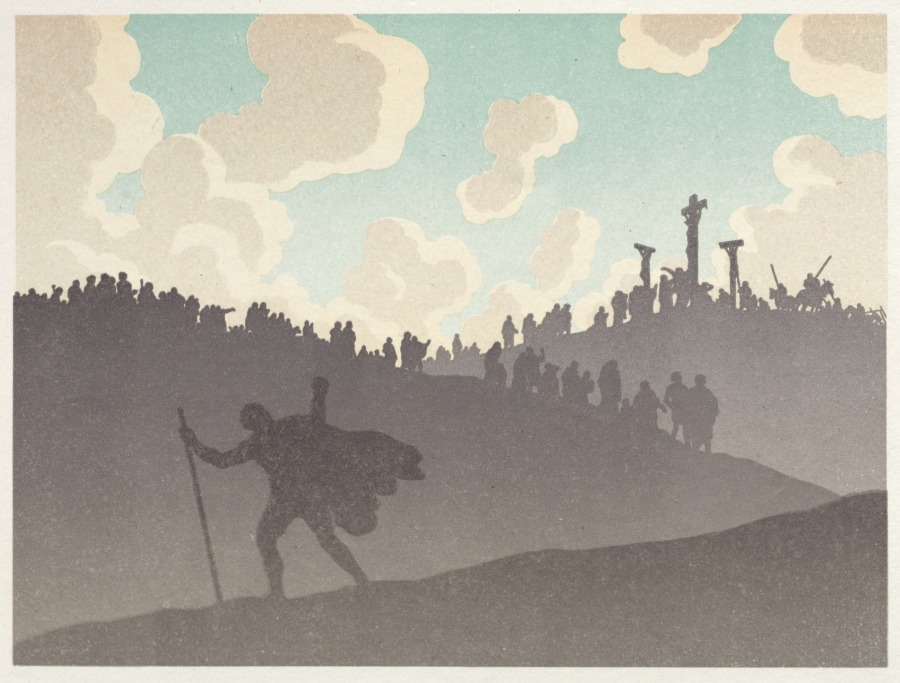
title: The Wandering Jew: The Desert: The Crucifixion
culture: France, 19th century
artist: Henri Rivière (French, 1864–1951)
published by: Verneau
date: 1896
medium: color lithograph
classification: Portfolio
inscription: title page is signed, in blue crayon: Henri Rivière